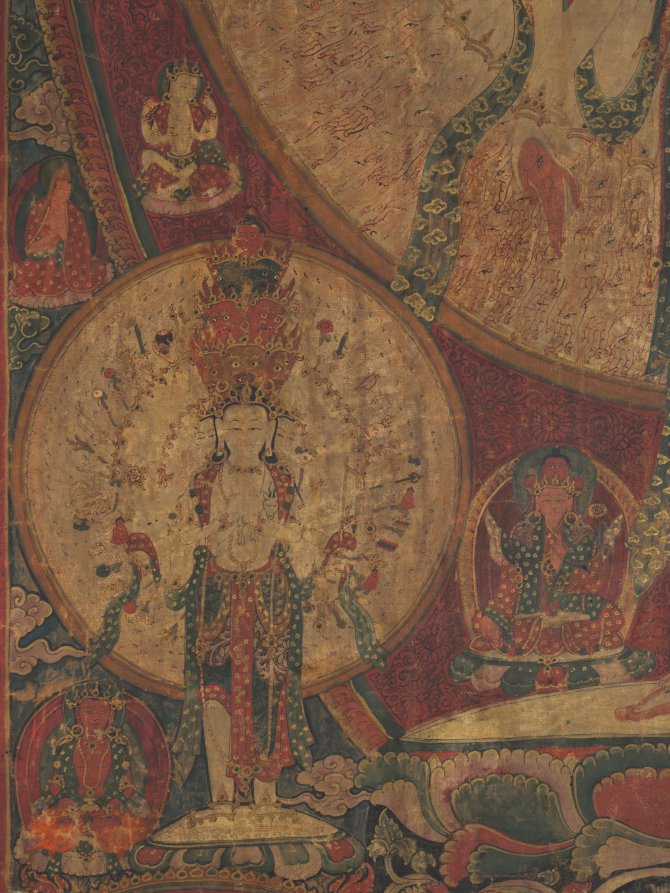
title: Eleven-Headed, Thousand-Armed Bodhisattva of Compassion (Avalokiteshvara)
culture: Western Tibet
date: c. 1500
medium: Gum tempera and ink on cotton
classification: Painting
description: One thousand arms surround the central figure like a radiating halo. Each hand has an eye in the palm to see the suffering of all beings, generating the sense of compassion that this figure embodies. The special form of the central image of the bodhisattva Avalokiteshvara derives from the mystic vision of a nun named Gelongma Palmo, who was born a Kashmiri princess, but prayed for leprosy to avoid having to marry and became an accomplished nun. While meditating in a cave, she achieved this vision of 11-headed, 1,000-armed Avalokiteshvara, who cured her leprosy and guided her on the path to enlightenment.